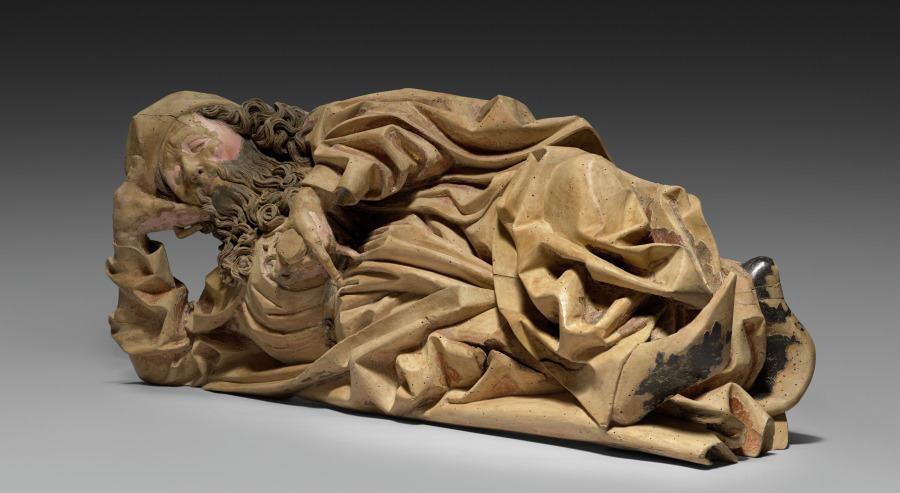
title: Jesse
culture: Germany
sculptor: Veit Stoss (German, c. 1445–1533)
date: c. 1500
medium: Limewood, polychromed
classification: Sculpture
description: The figure shows the sleeping Jesse, the father of David from the Old Testament. As the ancestor of the family tree of Christ, he was depicted in the Middle Ages sleeping as the starting point of the tree, on whose branches the ancestors of Christ are depicted. Mary with the Christ child is always shown at the top. The figure comes from a wooden altarpiece from an unknown church, possibly in Nuremberg, which is now lost. Veit Stoss is one of the most prominent German sculptors around 1500 who was mainly active in Nuremberg (Bavaria, Germany) and Krakow (Poland), also as a painter and engraver.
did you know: The family tree of Christ starts from Jesse, the father of David in the Old Testament.